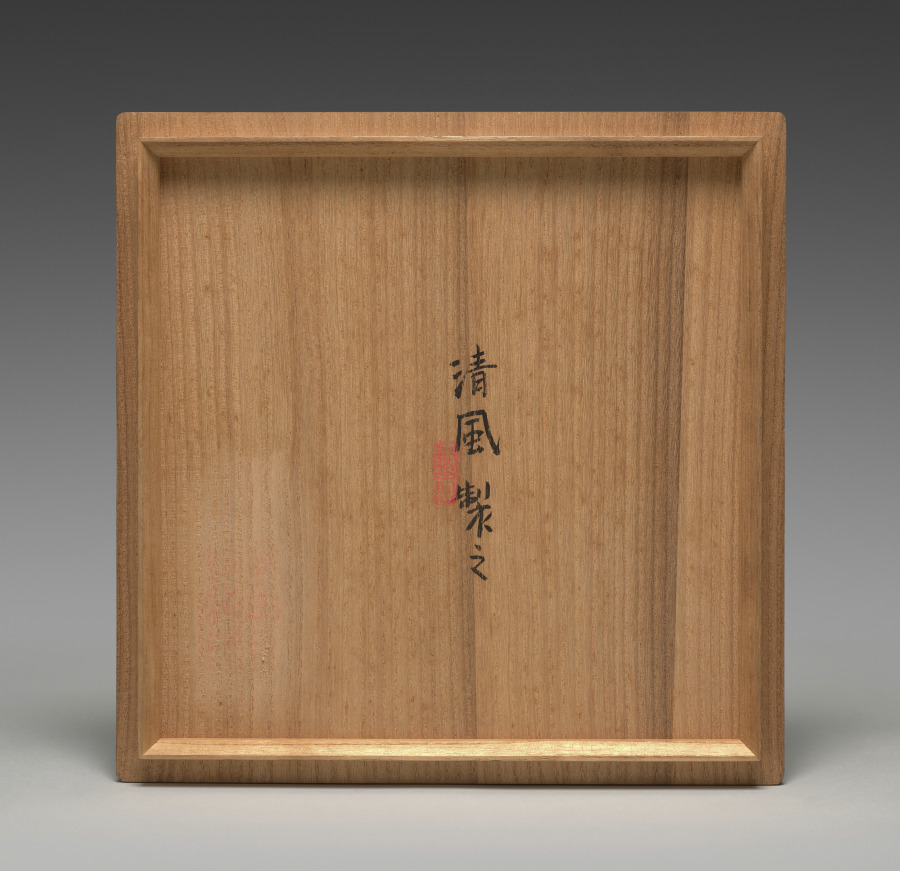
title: Sweets Bowl with Plum Tree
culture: Japan, Taishō period (1912–26) to Shōwa period (1926–89)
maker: Seifū Yohei IV (Japanese, 1872–1951)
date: 1914–46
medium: Porcelain with underglaze color and modeled design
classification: Ceramic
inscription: 清風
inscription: 清風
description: In Chinese culture, the plum symbolizes the virtue of perseverance. For his sweets bowl based on Qing dynasty (1644–1911) Chinese prototypes, Seifū Yohei IV first painted the gnarled boughs of a plum tree in iron oxide on the surface. Then he made the tree’s blossoms slightly raised by building up slip, or liquified clay. He painted their centers yellow. Before applying the blue glaze, he covered the blossoms with paper so that they remained white.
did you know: Broad access to high-quality Chinese ceramics occasioned by the collapse of the Qing dynasty (1644–1911) and the dispersal of elite Chinese collections presented Seifū Yohei IV with models for both molded decoration and painted motifs.